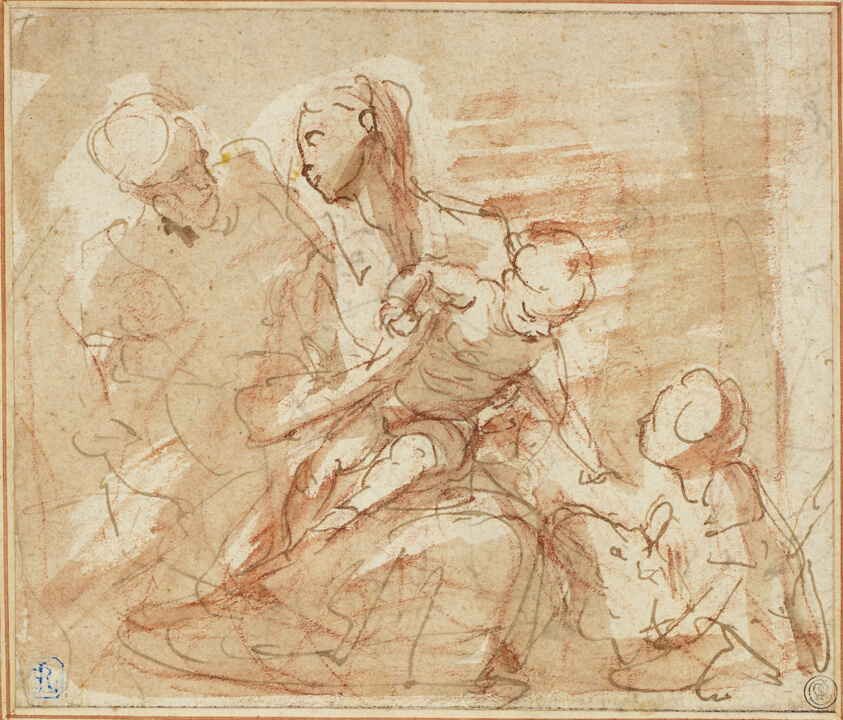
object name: Drawing and Watercolor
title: Holy Family with the Infant Saint John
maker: Valerio Castello (Italian, 1624-1659)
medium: Pen and brown ink, with brush and pale brown wash, over red chalk and brush and red chalk wash, on ivory laid paper, laid down on ivory wove paper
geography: Italy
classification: pen and ink drawings; drawings (visual works); prints and drawing